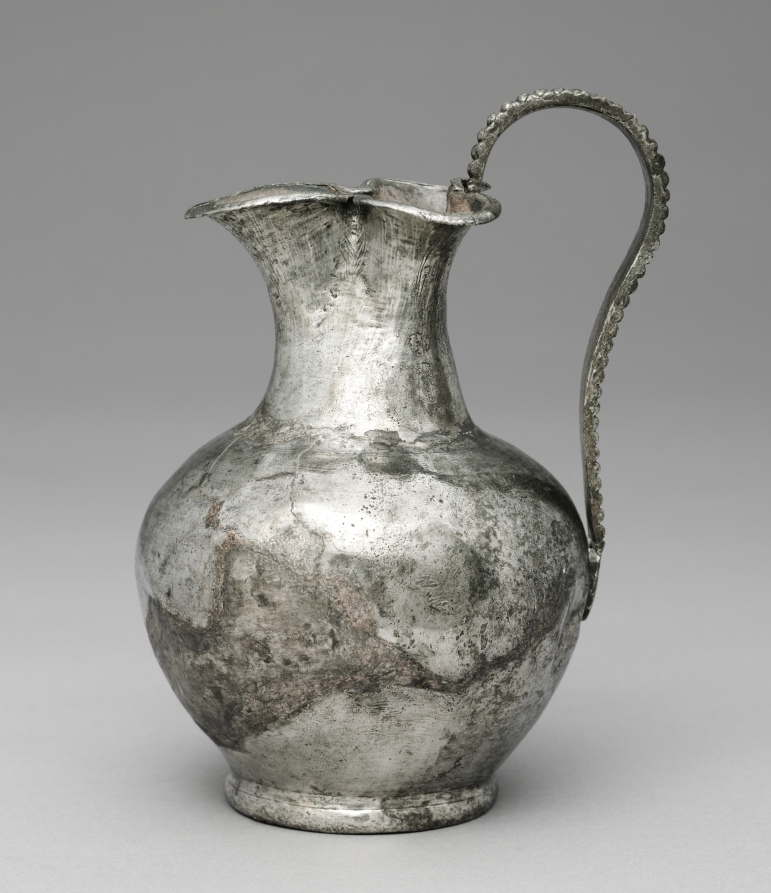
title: Ewer with a Trefoil (Three-Part) Spout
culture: Byzantium, Syria(?), Byzantine period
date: 300–600 CE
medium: silver with niello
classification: Metalwork